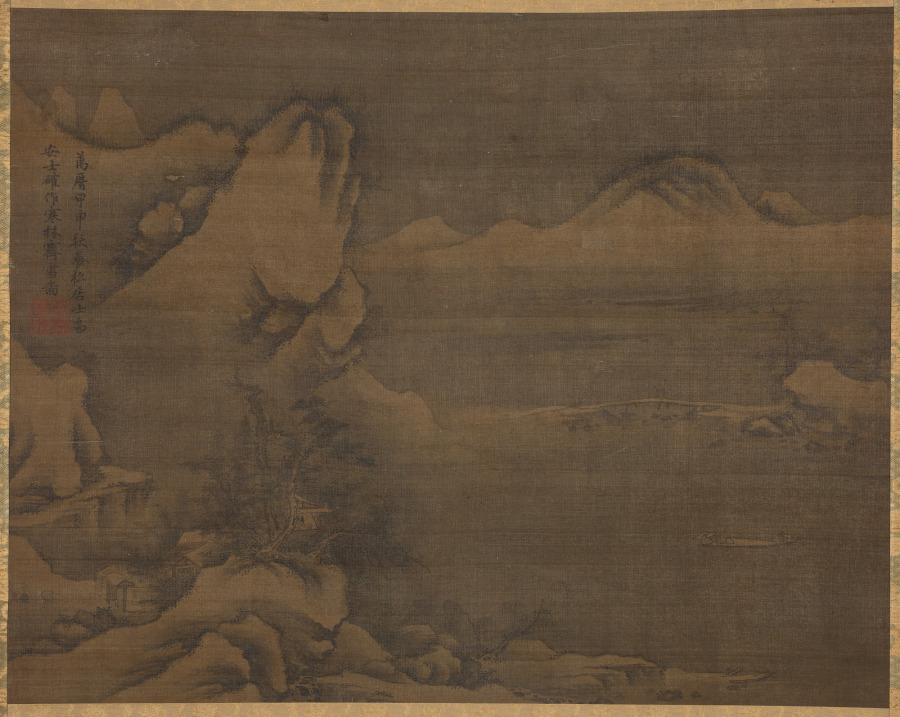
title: Snowscape with Figures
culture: Korea, Joseon dynasty (1392–1910)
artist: Kim Si (Korean, 1524–1593)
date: 1584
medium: hanging scroll; ink on silk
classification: Painting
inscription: The inscription (款識) on the upper left corner reads as following: 萬曆甲申秋養松居士爲安士確作寒林霽雪圖. The painter's seal (朱文方印) printed reads as following: 金禔季綏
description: This hanging scroll is a rare surviving example of early Joseon period painting. The painter Kim Si (1481–1537) was a member of the aristocracy, or high-ranking men. However, after his father, Kim Anro (1481–1537) fell out of power, Kim Si retreated himself and spent his life as a reclusive artist. In such a context, this image of a solitary scholar in his studio surrounded by trees and snow-covered mountains does not simply render an idealized life of a recluse focusing on scholarly pursuits; rather, it is the painter’s mindscape, indicating that the glory of his family has become a forgotten part of his past.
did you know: Having retreated to the snow-covered mountains, a scholar sits in his studio surrounded by trees. An empty wooden bridge in the distance appears to be longing for friends from afar. Such iconography often evokes the idea of an idealized recluse focusing on scholarly pursuits.